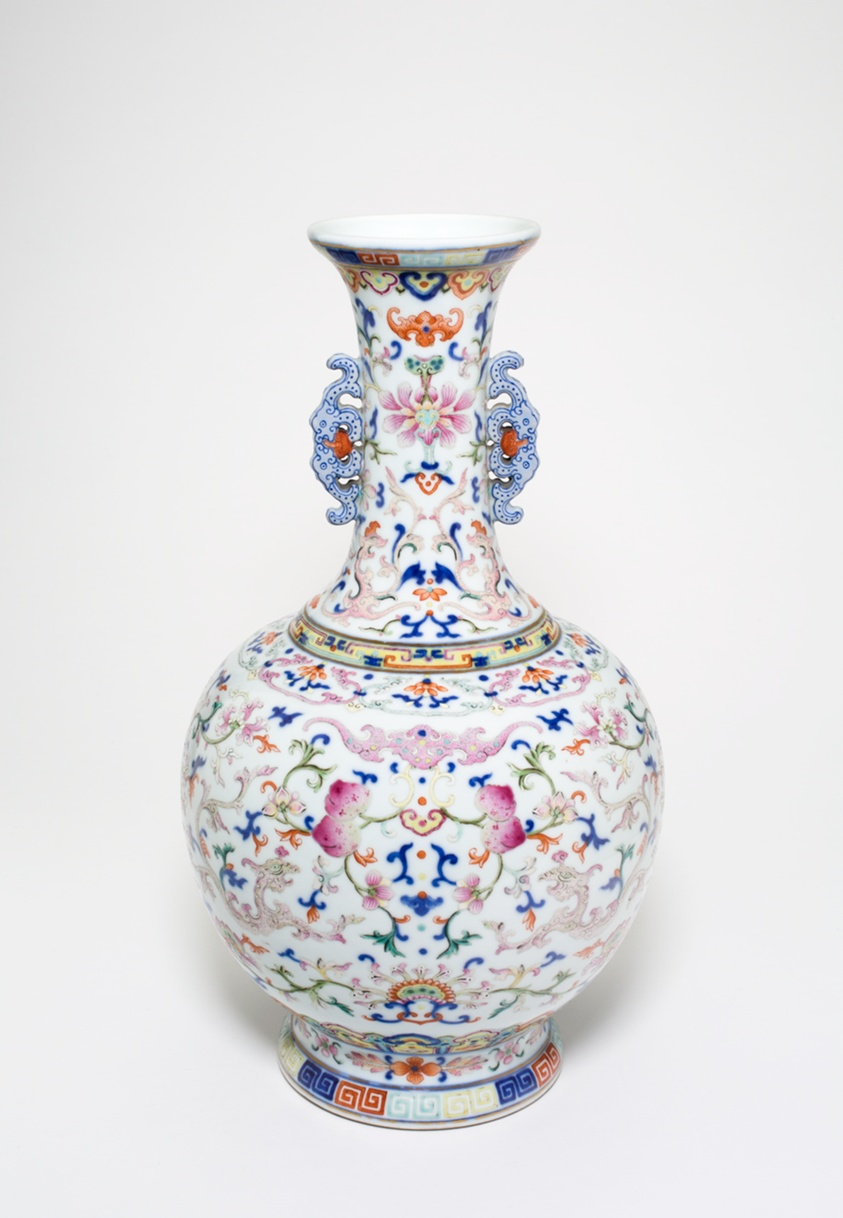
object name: Vessel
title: One of a pair of famille-rose 'lotus' bottle vases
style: Chinese (culture or style)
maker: China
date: Qing dynasty (1644–1911), Qianlong reign mark and period (1736–1795)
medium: Porcelain painted in underglaze blue and overglaze enamels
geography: China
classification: vase; porcelain; vessel; asian art; ceramics